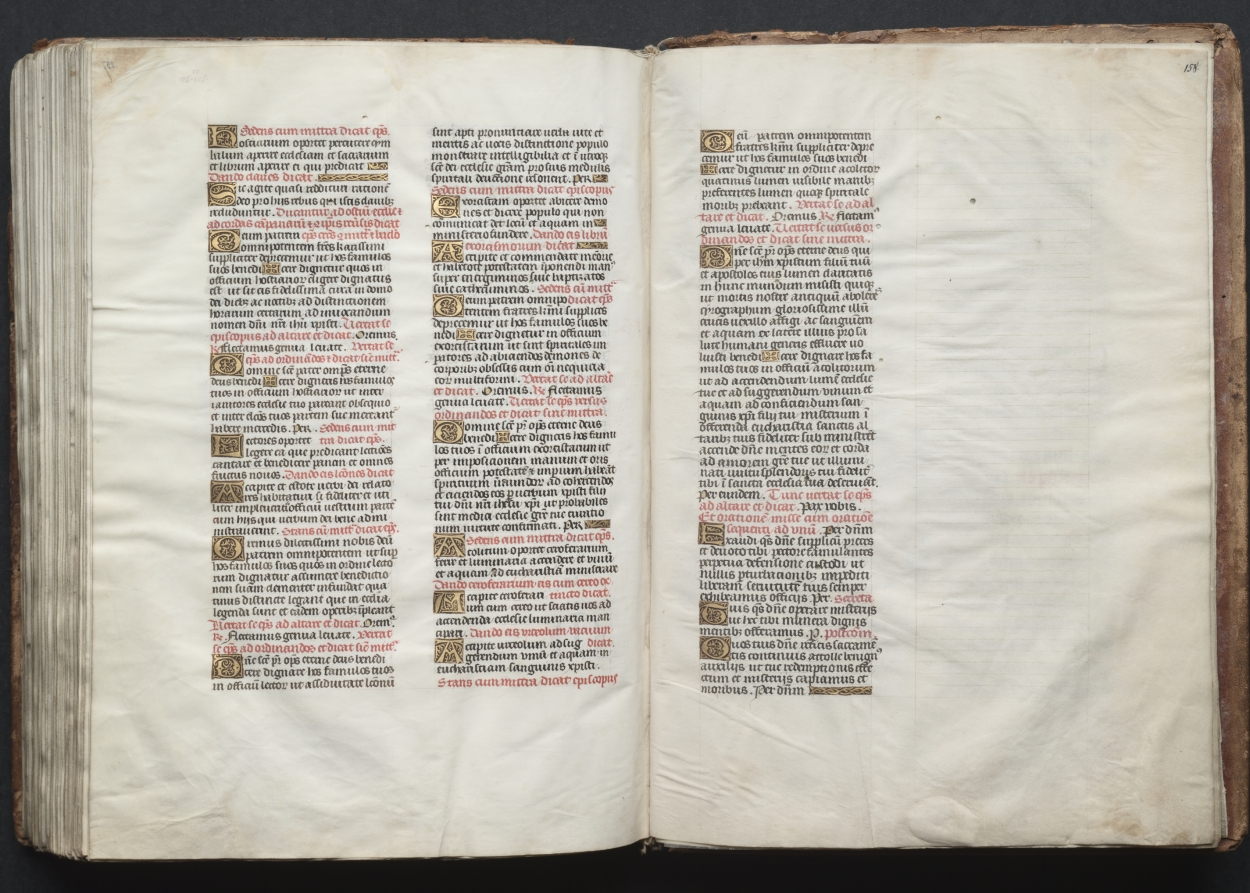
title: The Gotha Missal: Fol. 158r, Text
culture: France, Paris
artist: Master of the Boqueteaux (French)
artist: and Workshop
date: c. 1375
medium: ink, tempera, and gold on vellum; blind-tooled leather binding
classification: Bound Volume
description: The style and quality of this manuscript's decoration is typical of deluxe Parisian books made for aristocratic or royal patrons. Most of the book's decoration appears to be the work of the Master of the Boqueteaux, an artist active at the court of King Charles V (died 1380). His style was apparently shared by a number of book illuminators working in and around Paris. It is very possible that the Gotha Missal belonged to Charles V, but is not provable because the manuscript has no royal portraits and lacks a colophon. Given the book's magnificent decoration, however, it would seem that it was produced for a Valois prince, if not for the king himself. The manuscript receives its name from the German dukes of Gotha, its later owners.